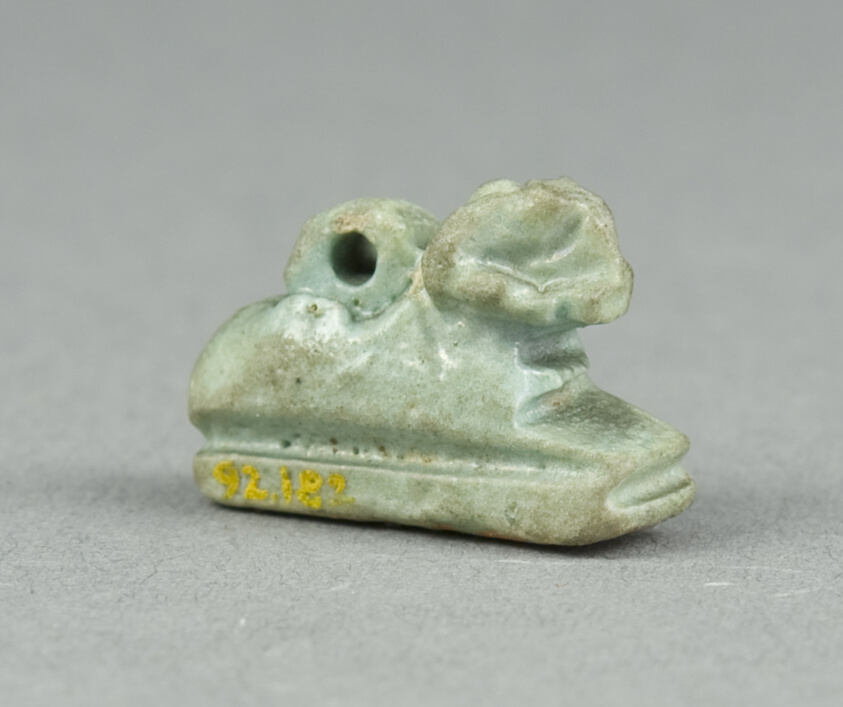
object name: Costume and Accessories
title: Amulet of a Recumbent Ram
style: third intermediate period, egyptian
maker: Egyptian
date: Third Intermediate Period–Late Period, Dynasty 21–31 (about 1069–332 BCE)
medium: Faience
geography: Egypt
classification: amulet; jewelry; ceramics; ancient art; costume; faïence (composite material)